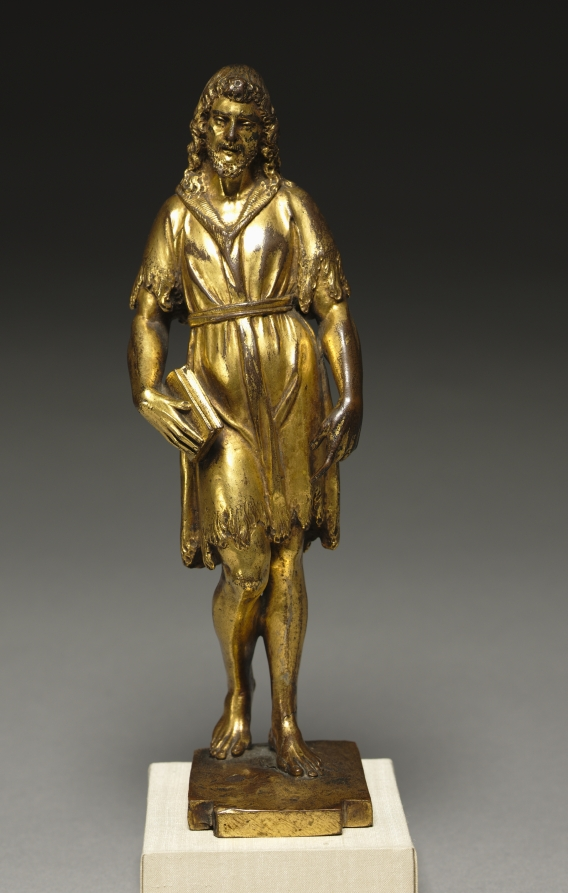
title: Saint John the Baptist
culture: Italy, Venice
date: c. 1550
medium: gilt bronze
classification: Sculpture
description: This small bronze, covered with gold, was produced in multiple versions. Saint John stands here, looking calm and composed, in a rather graceful pose. This piece has a sense of forward motion even though the figure appears to be leaning back in this stance. Elegant and subtle, this piece is a beautiful example of small cast Renaissance bronzes.